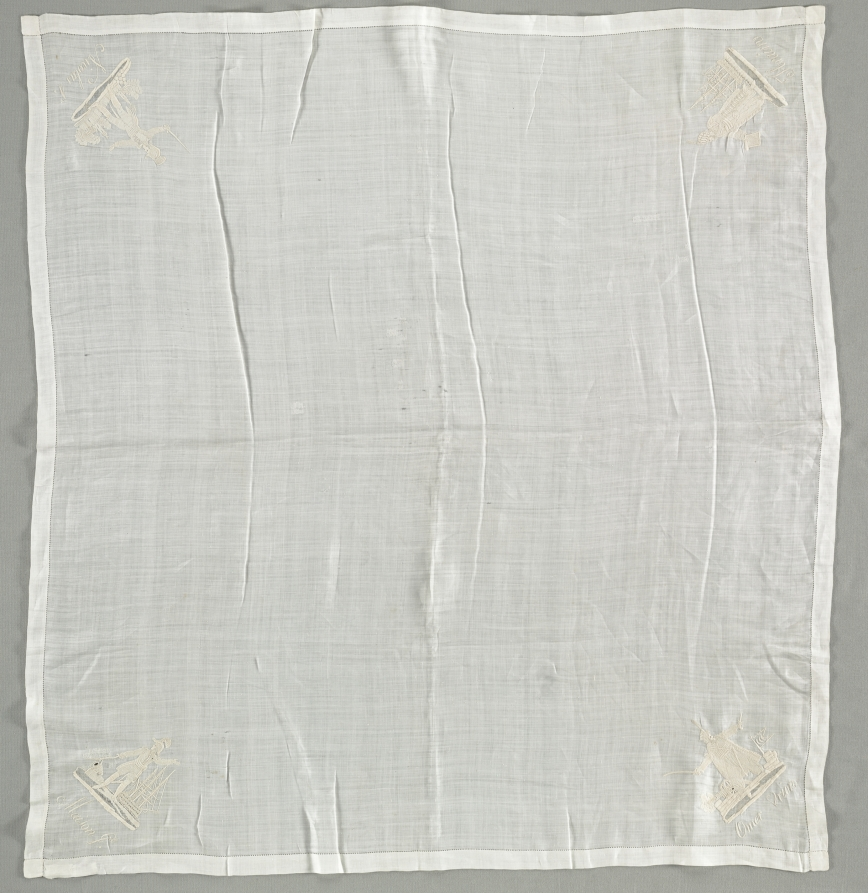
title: Handkerchief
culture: Russia or France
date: c. 1800–1825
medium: Plain weave linen, embroidered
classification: Embroidery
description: Embroidered in white in the corners of this handkerchief are generals associated with the Turkish-Greek wars--General Maison, Nicolas I, Ihraim, and Omer Vrion.